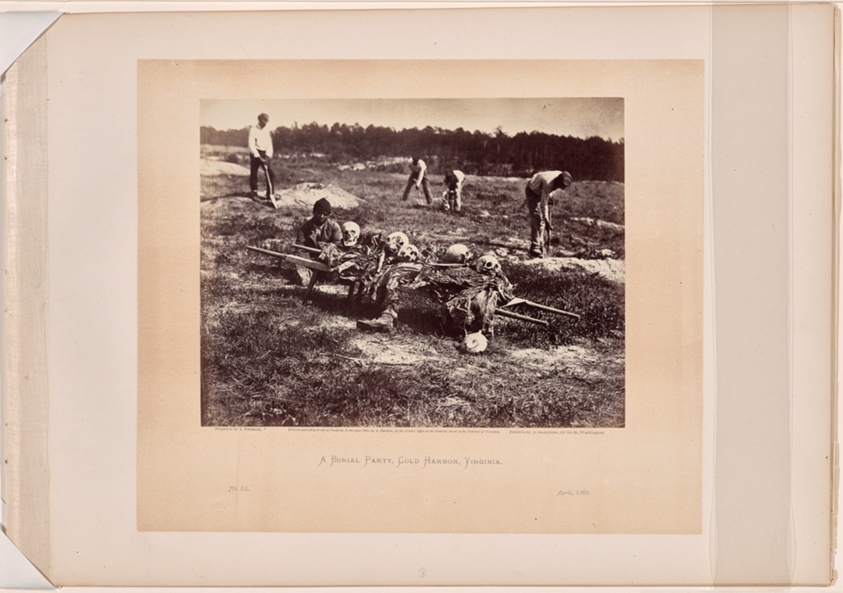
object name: Photograph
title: A Burial Party, Cold Harbor, Virginia, pl. 94 from the album "Gardner's Photographic Sketch Book of the War, Volume II" (1866)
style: 19th century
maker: John Reekie (American, active 1861–1865)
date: April 1865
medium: Albumen print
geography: United States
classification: albumen silver print; photographic process; photography; photograph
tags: Collected by Hugh Edwards, Gardner's Photographic Sketch Book